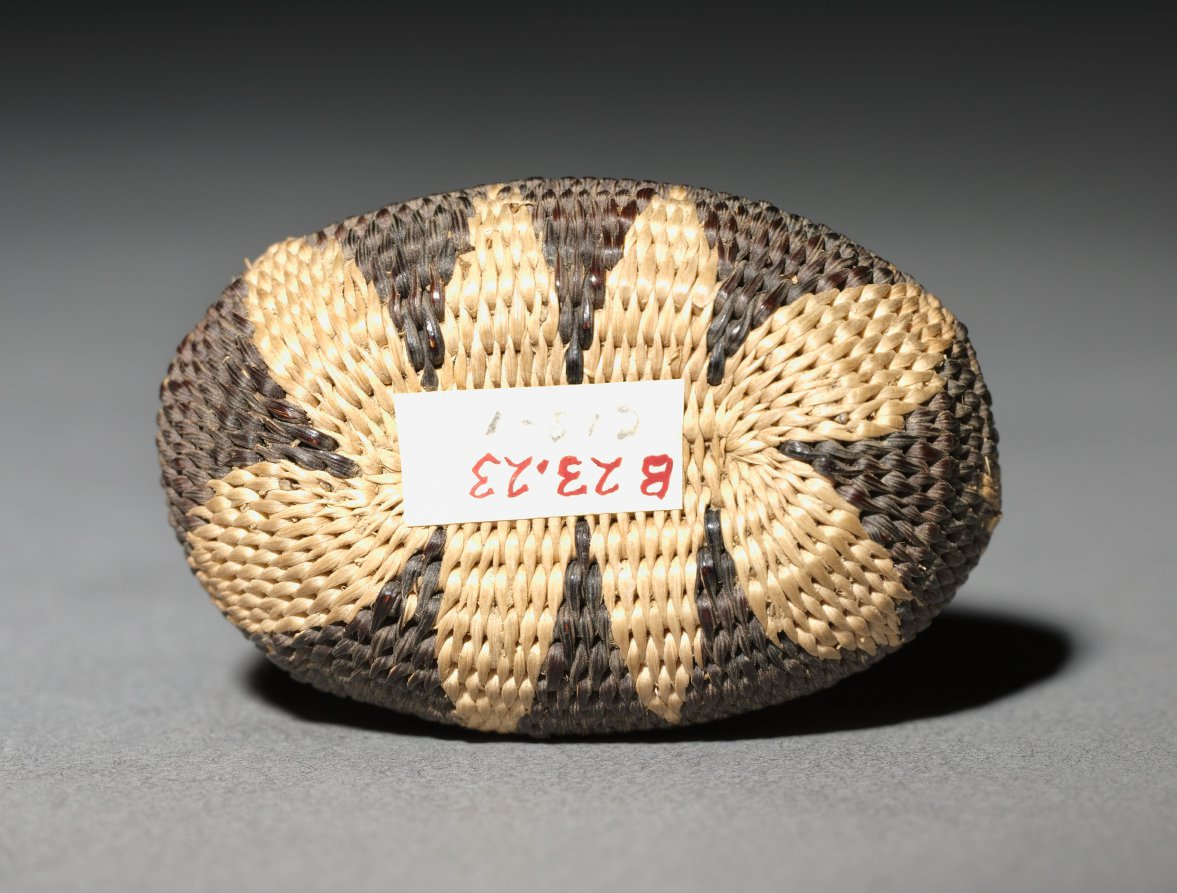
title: Miniature Basket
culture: America, Native North American, Southwest, Arizona, Akimel O'odham (Pima), Unassigned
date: before 1923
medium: plant fiber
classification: Basketry